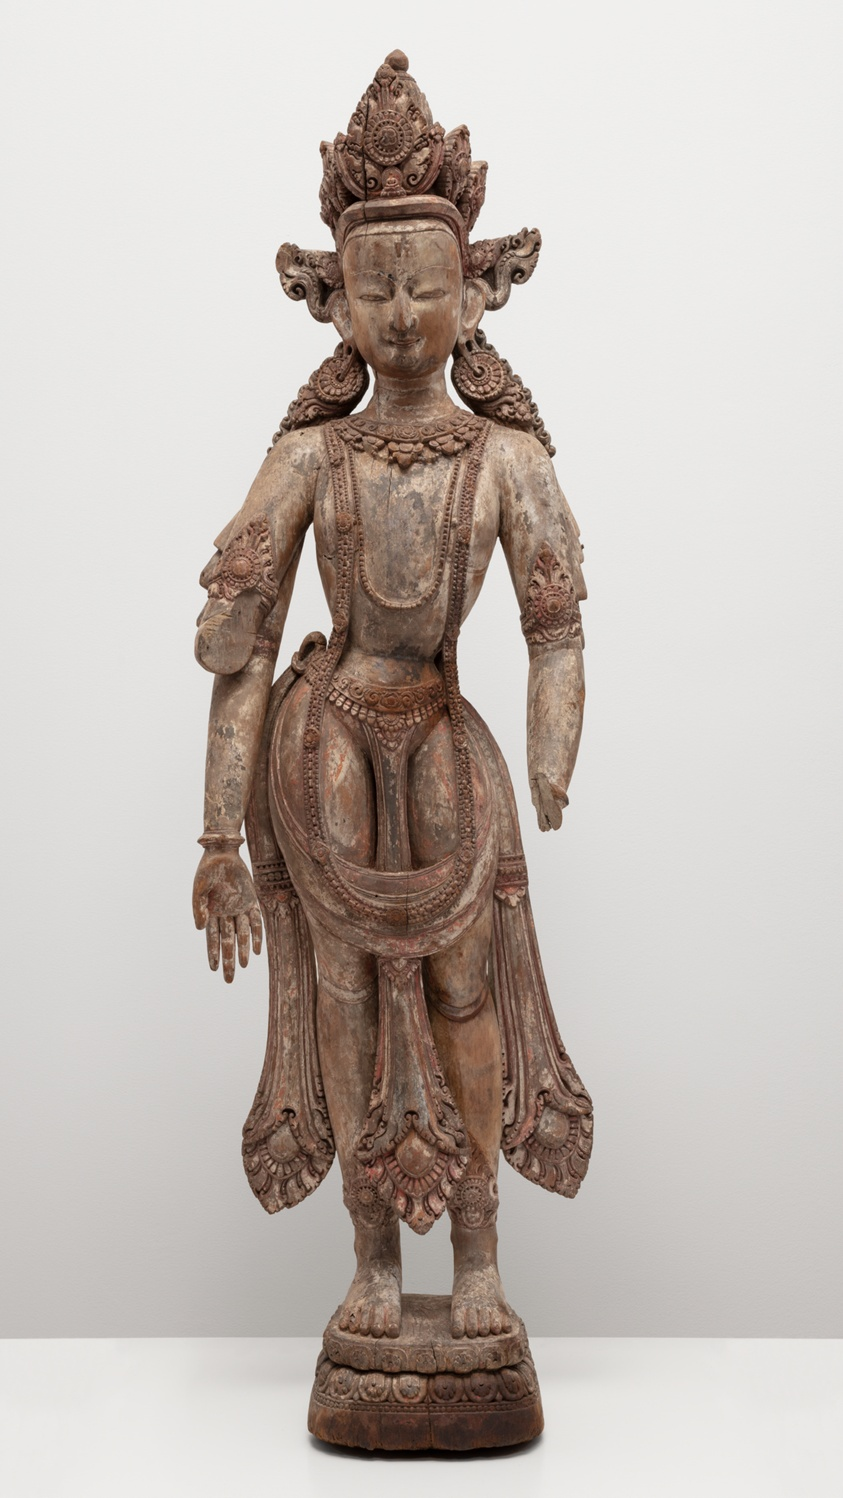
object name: Sculpture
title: Bodhisattva Amoghapasha Lokeshvara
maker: Nepal; Kathmandu Valley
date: 15th century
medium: Painted wood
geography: Kathmandu Valley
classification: wood; sculpture; asian art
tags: religion, bodhisattva, Buddhism